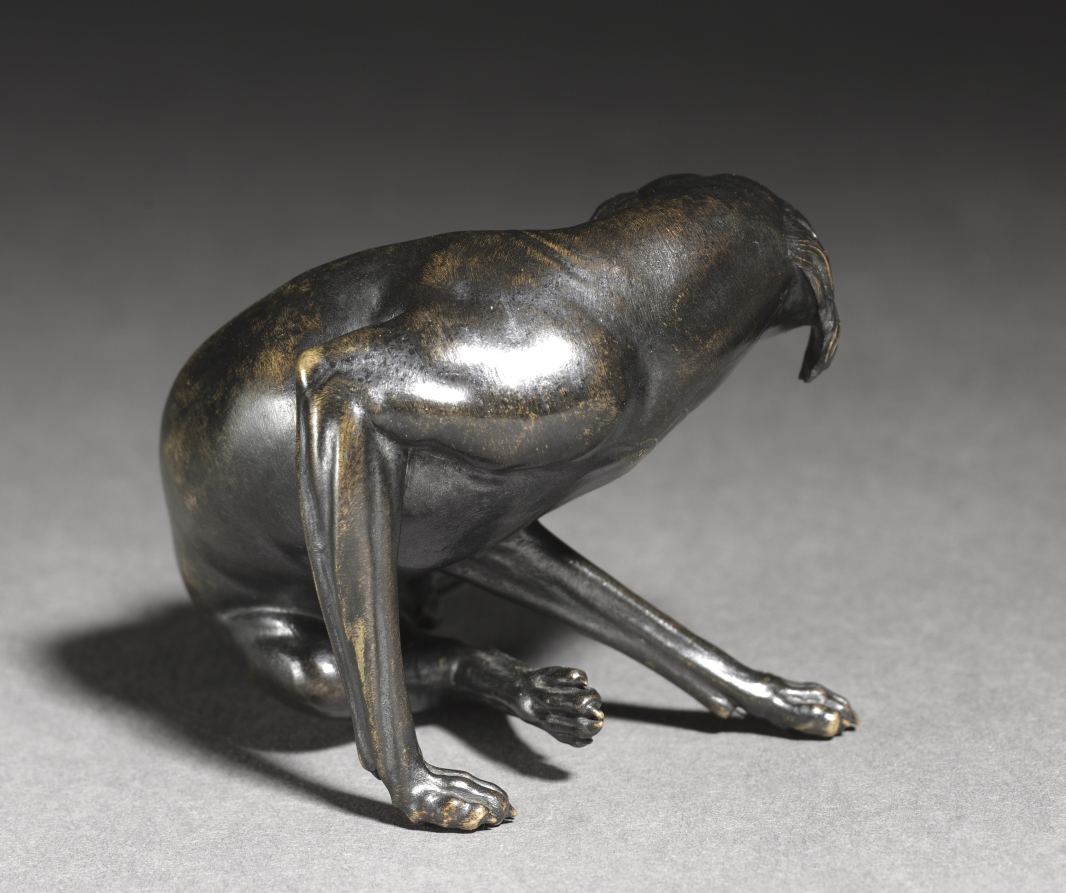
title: Sitting Dog Scratching Himself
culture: Southern Germany, possibly Nuremberg, 16th century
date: c. 1525–1530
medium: bronze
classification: Sculpture